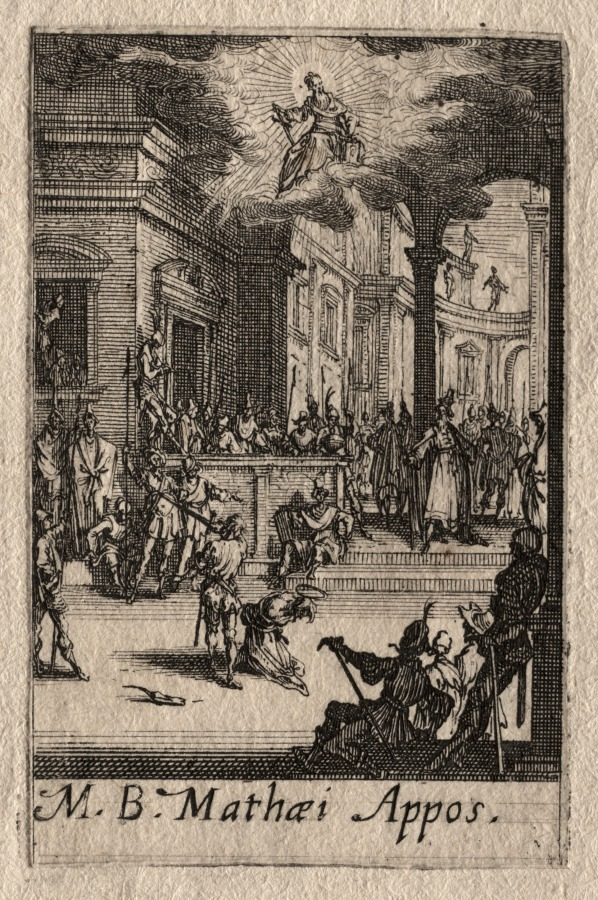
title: The Martyrdom of the Apostles: St. Matthew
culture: France, 17th century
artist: Jacques Callot (French, 1592–1635)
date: ca. 1632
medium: etching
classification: Print